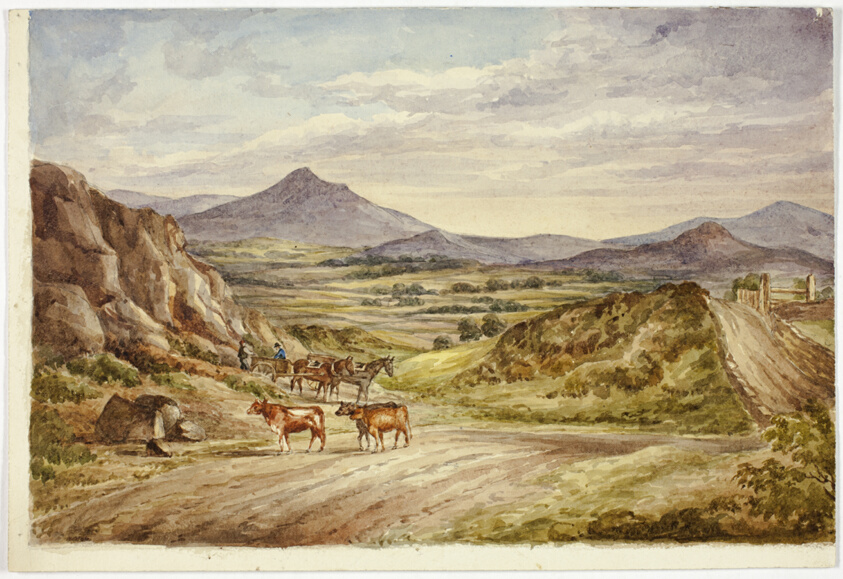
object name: Drawing and Watercolor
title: Wicklow Hills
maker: Elizabeth Murray (English, c. 1815-1882)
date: 1843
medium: Watercolor over traces of graphite on ivory wove paper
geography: England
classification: watercolor; drawings (visual works); prints and drawing